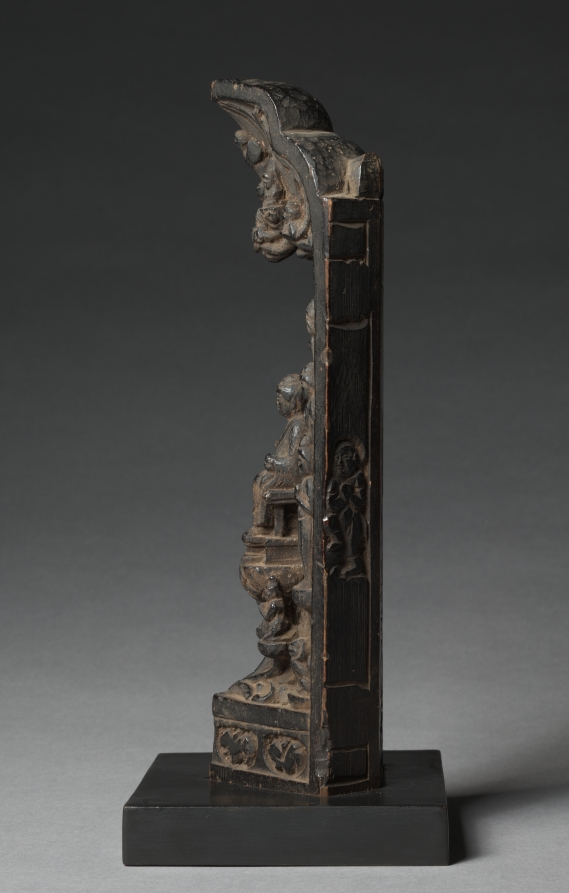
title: Wing of a Portable Shrine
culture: Japan, Heian period (794–1185)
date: 794–1185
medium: wood with lacquer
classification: Sculpture